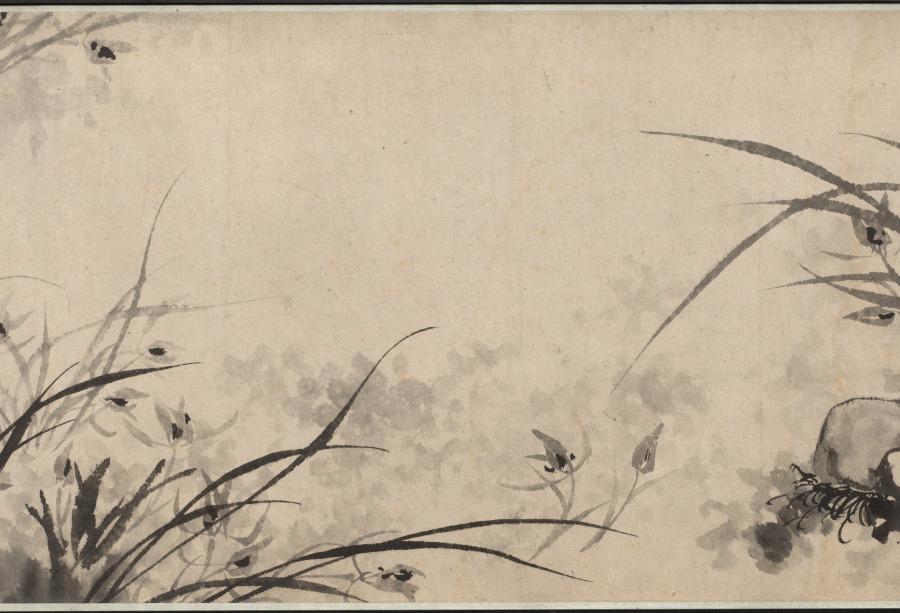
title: Rocks, Orchid, and Bamboo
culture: China, Qing dynasty (1644-1911)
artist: Shitao (Chinese, 1642–1707)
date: 1662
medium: handscroll; ink on paper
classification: Painting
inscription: Title colophon in four characters with signature and two seals on gold-flecked paper.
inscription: Artist's signature, inscription (with date of 1662), five seals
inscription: Colophon with two seals.